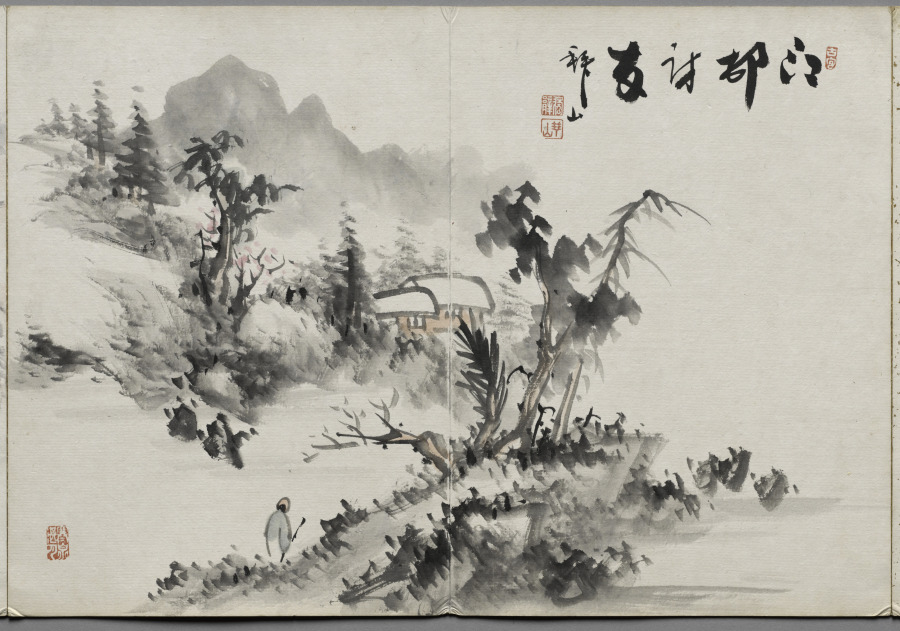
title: Painting Seven from Album of Paintings by Haizan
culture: Japan, Meiji period (1868–1912) or Taishō period (1912–26)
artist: Yoshitsugu Haizan (Japanese, 1846–1915)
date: late 1800s–early 1900s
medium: page spread from double-sided accordion album; ink and color on paper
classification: Painting